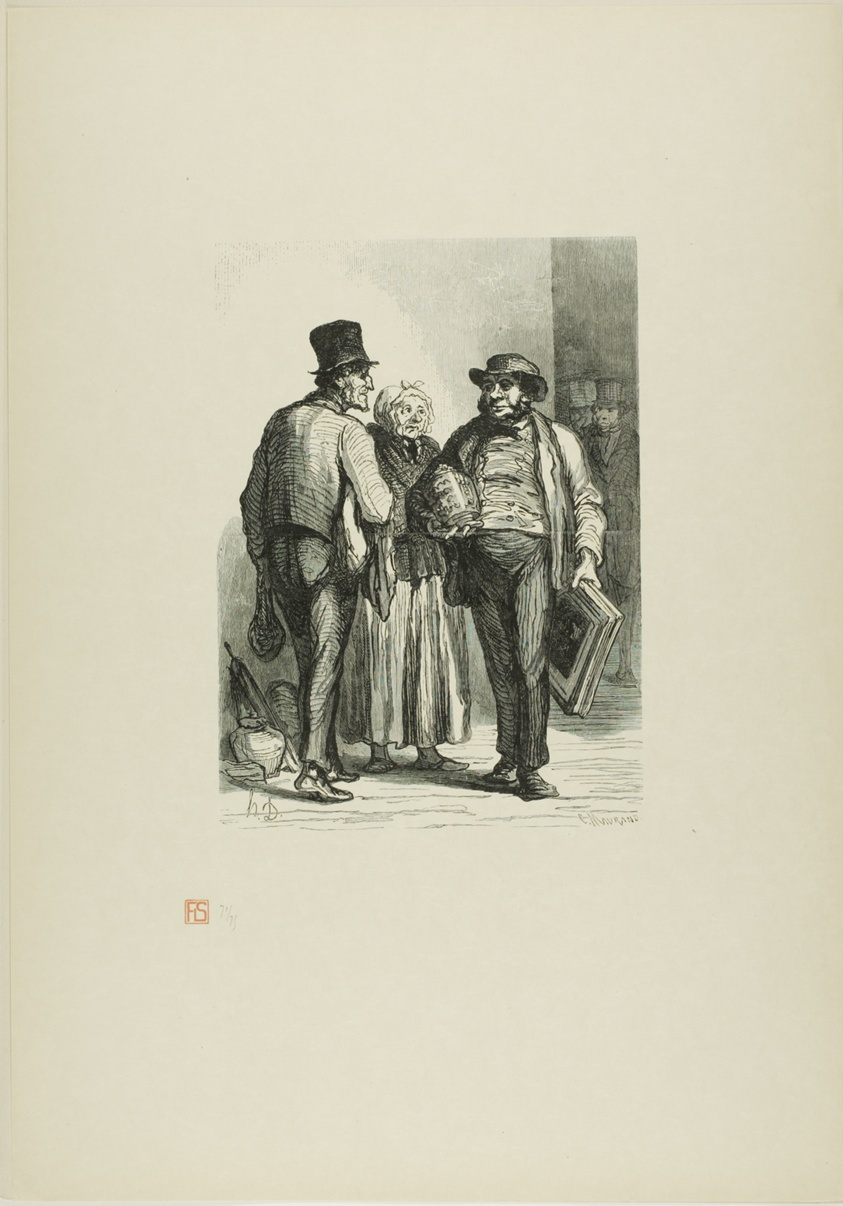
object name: Print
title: The Auction House: The Dealers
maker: Charles Maurand (French, 1824-1904); after Honoré Victorin Daumier (French, 1808-1879); printed by François Louis Schmied (Swiss, 1873-1941); published by Jules Meynial (French, 20th century)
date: 1863, printed 1920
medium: Wood engraving on cream Japanese paper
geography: France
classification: wood engraving; print; prints and drawing